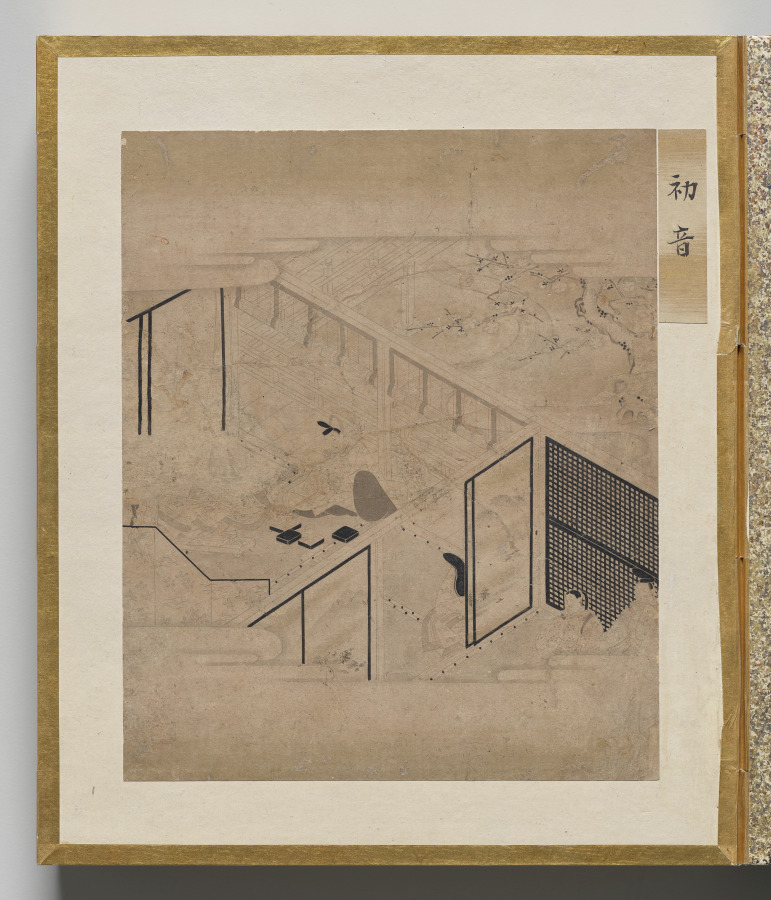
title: First Warbler from Album of Illustrations for the Tale of Genji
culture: Japan, Edo period (1615–1868)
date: 1600s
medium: painting in an accordion-style album; ink, light color, and gold on paper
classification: Bound Volume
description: This album contains illustrations for the classic literary work the Tale of Genji, authored in the 1000s by Murasaki Shikibu, an aristocrat of the Heian period (794–1185) court. The scenes are painted in the “white drawing” (hakubyō) mode, in which a fine ink line is used to depict figures and spaces with great subtlety, punctuated only occasionally by traces of red pigment for a character’s lips, a detail of a garment, or a decorative element. These two scenes illustrate episodes from the chapters “Thin Veil of Cloud” (Usugumo) and “Barrier Gate” (Sekiya).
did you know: The illustrations are identified by chapter title in cartouches to the upper right of the paintings.